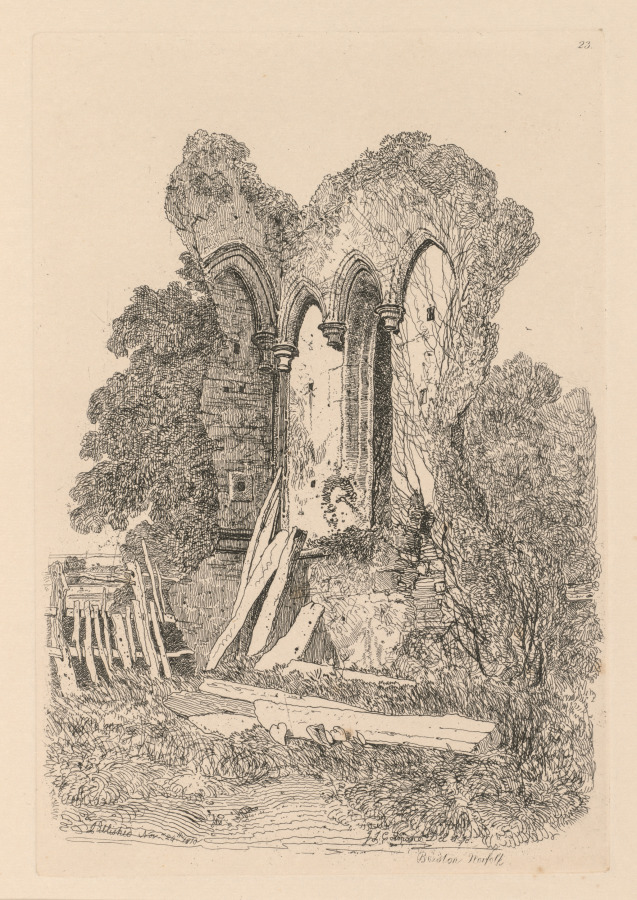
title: Liber Studiorum: Plate 23, Ruins at Beeston, Norfolk: No. 3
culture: England, 19th century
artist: John Sell Cotman (British, 1782–1842)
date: 1838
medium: softground etching, from a bound volume containing 48 plates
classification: Bound Volume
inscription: In plate, within image, upper right: 23; in plate, lower left, within image: Published Novr 24th 1810; in plate, lower right, within image: J S Cotman Del et Sc.; in plate, below image: Beeston, Norfolk